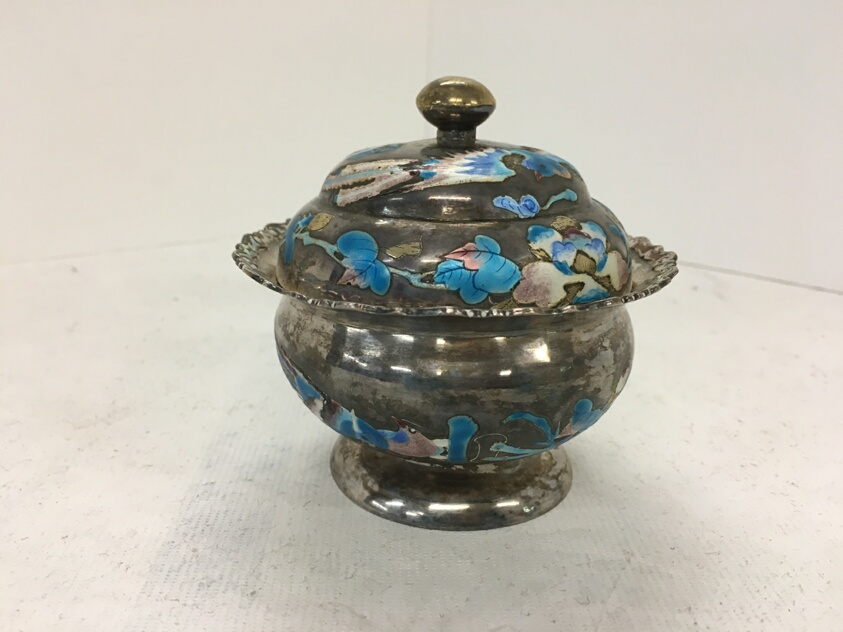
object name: Vessel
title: Cosmetic Bottle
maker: China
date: Qing dynasty (1644-1911), c.1800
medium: Silver and enamel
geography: China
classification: silver; metal; container; asian art